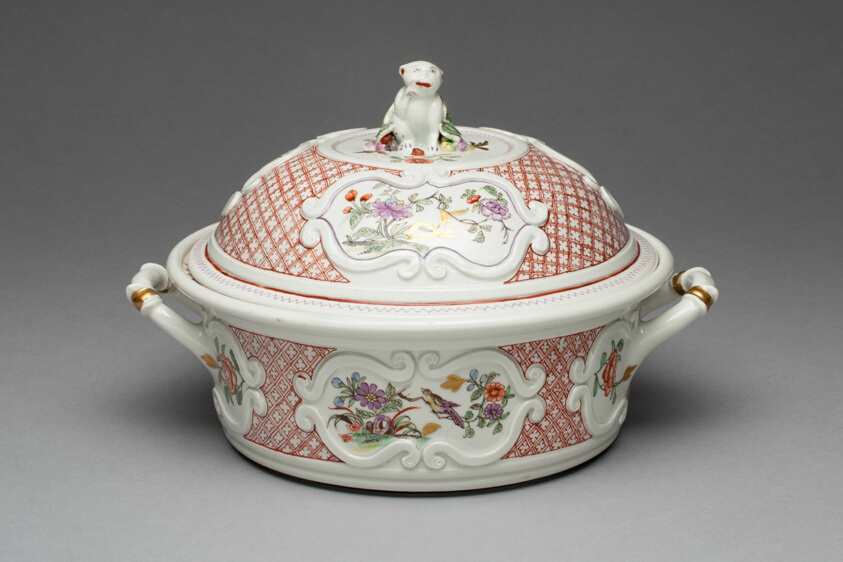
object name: Ceramics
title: Tureen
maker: Du Paquier Porcelain Manufactory (Austrian, 1718-1744)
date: c. 1725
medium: Hard-paste porcelain, polychrome enamels, and gilding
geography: Vienna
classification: tableware; porcelain; european decorative arts; ceramics